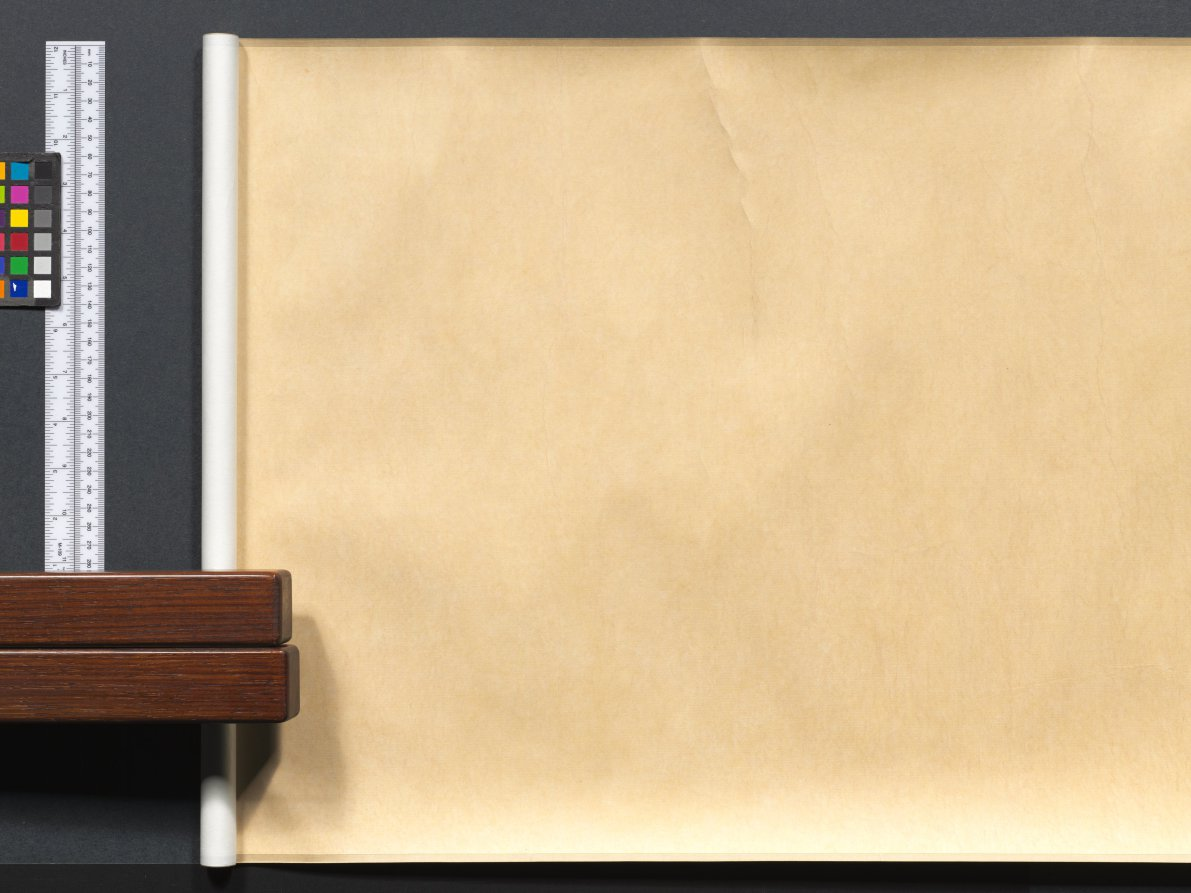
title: Calligraphy in Running Style based on Wang Bo's Essay on Tengwang Pavilion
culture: China, Changbai, Qing dynasty (1644-1911)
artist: Tiebao (Chinese, 1752–1824)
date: 1811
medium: handscroll, ink on paper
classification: Calligraphy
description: A member of the Donggo clan, Tiebao belonged to the Manchu Plain Yellow Banner army. As an official in the Qing court, he endured considerable vicissitude and his career was never smooth. Celebrated as a man of letters, he oversaw the publications of the Manchu military system as well as an anthology of poems by members of the imperial family and other Manchu dignitaries. In calligraphy, he was regarded as the equal of such eighteenth-century luminaries as Liu Yong (1720-1805) and Weng Fanggang (1733-1818). This handscroll is a work of his mature years and is exemplary of his disciplined and highly subtle approach to the art of calligraphy.